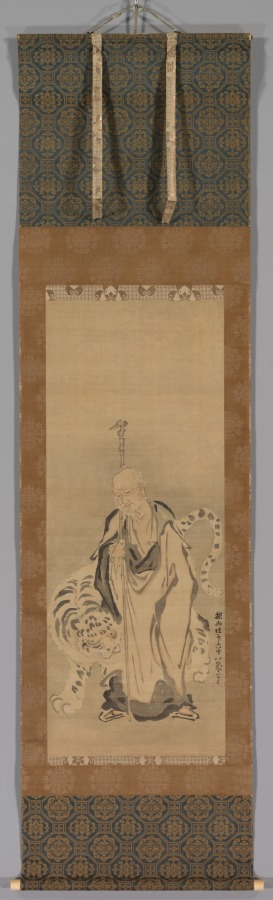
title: A Sage with Tiger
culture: Japan, Edo period (1615–1868)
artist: Kano Tan’yū (Japanese, 1602–1674)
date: 1661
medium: One of a triptych of hanging scrolls; ink and slight color on silk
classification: Painting